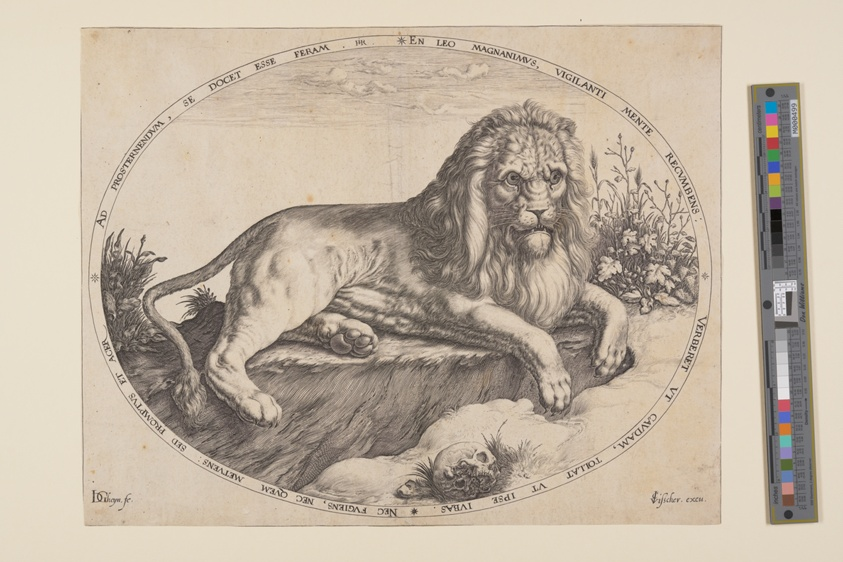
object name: Print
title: Den Grooten Leeuw (The Great Lion).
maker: Jacques de Gheyn II; Dutch, 1565–1629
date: c. 1590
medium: Engraving on ivory laid paper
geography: Netherlands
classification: print; paper; prints and drawing; engraving